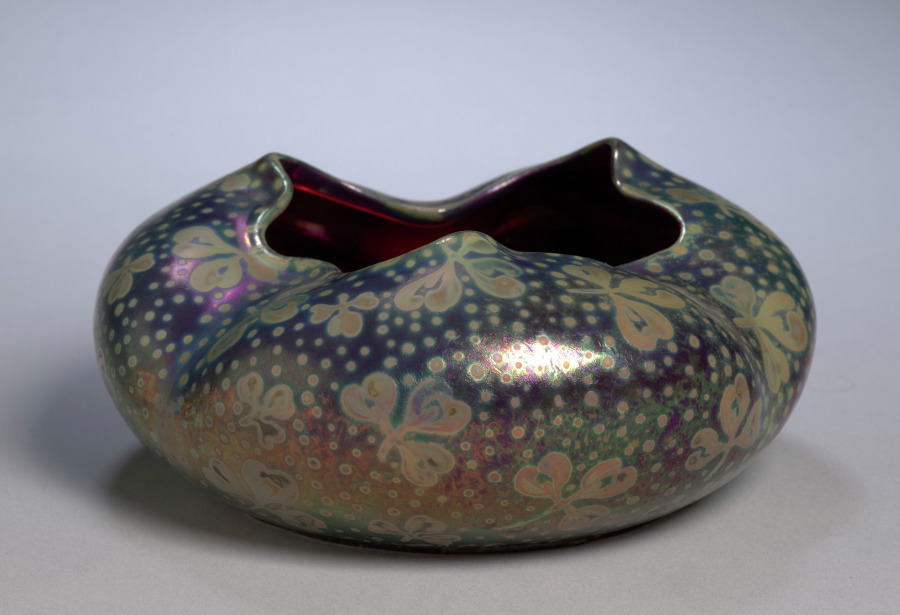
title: Bowl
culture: America, Ohio, Zanesville, early 20th Century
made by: Weller Pottery (American)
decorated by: Jacques Sicard (French, 1865–1923)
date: early 1900s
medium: earthenware decorated with lustre glazes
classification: Ceramic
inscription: inscribed on side near bottom: "SICA(?)D WELLER." Incised at center of bottom: 28.